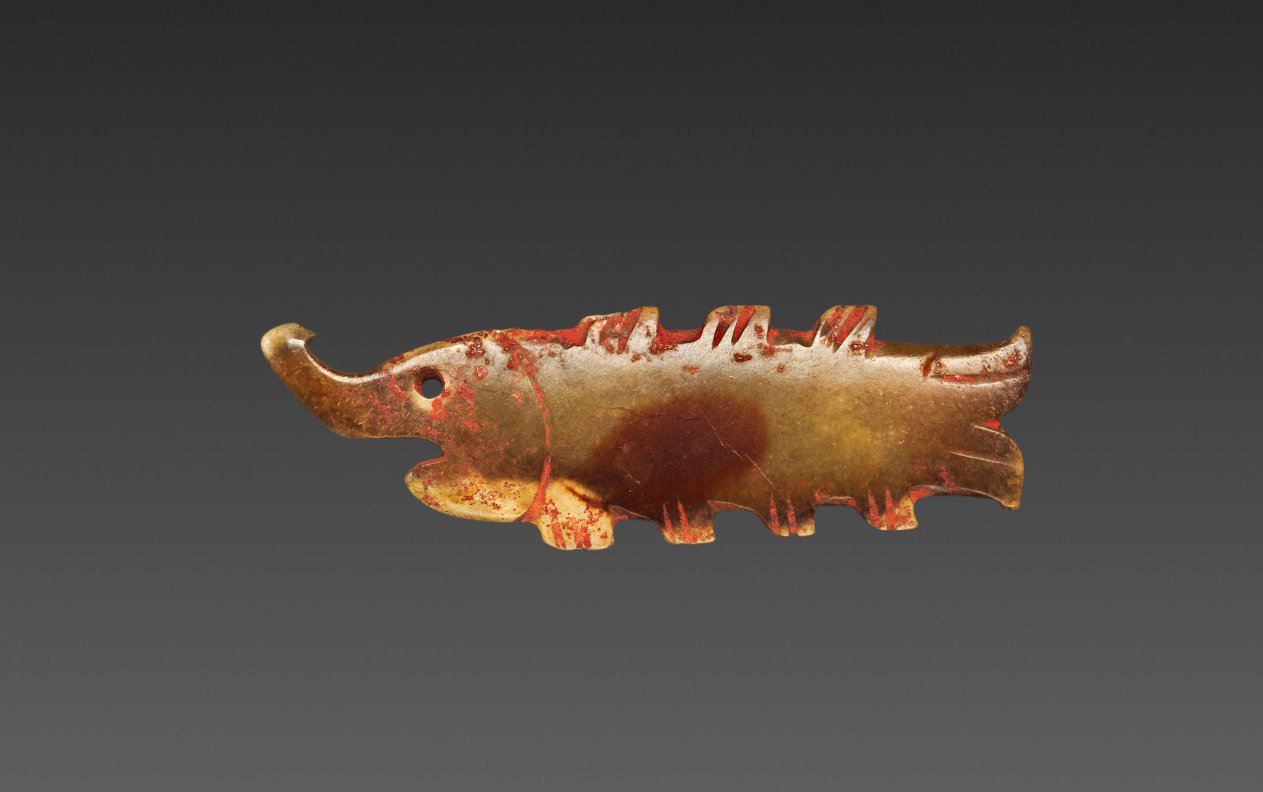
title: Fish with Curved Snout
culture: China, Shang dynasty (c. 1600–c. 1046 BCE) to Western Zhou dynasty (c. 1046–771 BCE)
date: 1200–1000 BCE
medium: jade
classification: Jade